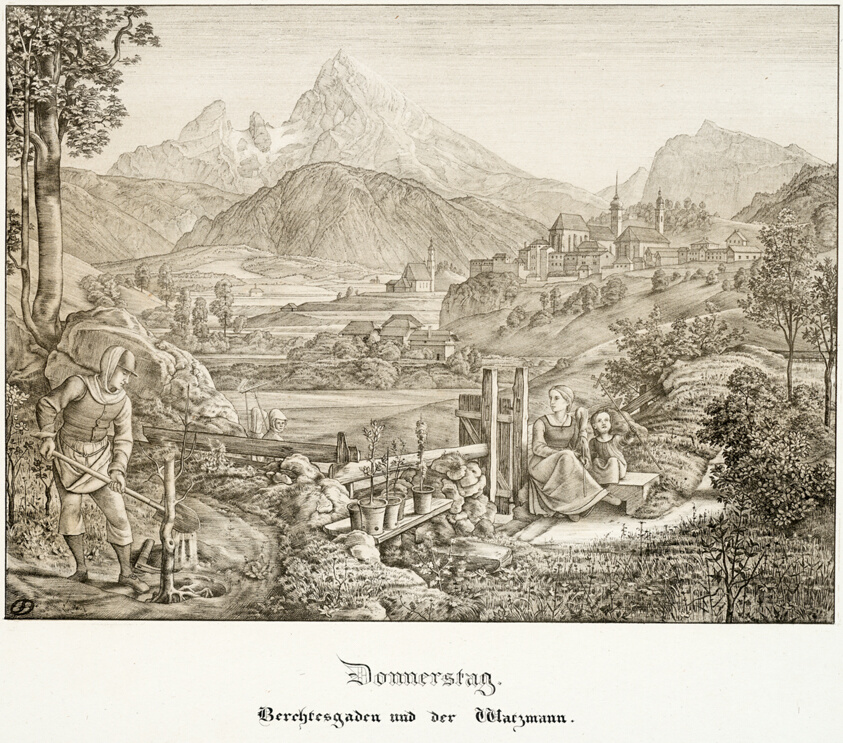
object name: Print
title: Thursday: Berchtesgaden and the Watzmann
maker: Ferdinand Olivier (German, 1785-1841)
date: 1823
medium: Lithograph with tint-stone on white wove paper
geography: Germany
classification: lithograph; print; prints and drawing